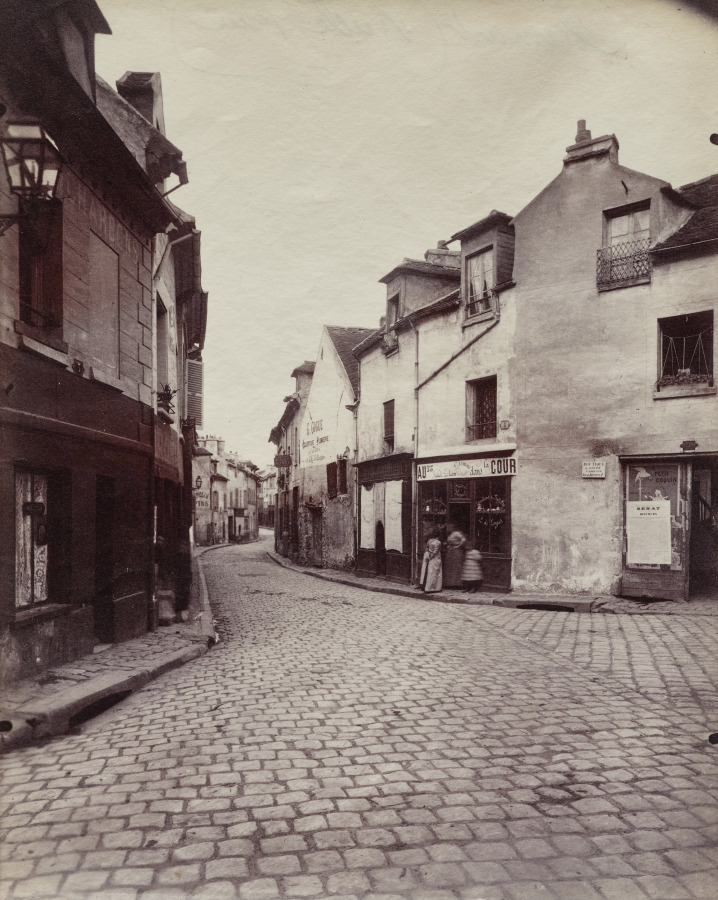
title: Clamart (Vielle Rue)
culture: France, 20th century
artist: Eugène Atget (French, 1857–1927)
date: before 1914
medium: albumen print from glass negative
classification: Photograph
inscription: Written in pencil on verso: "Clamart (Vielle Rue) 60 F"